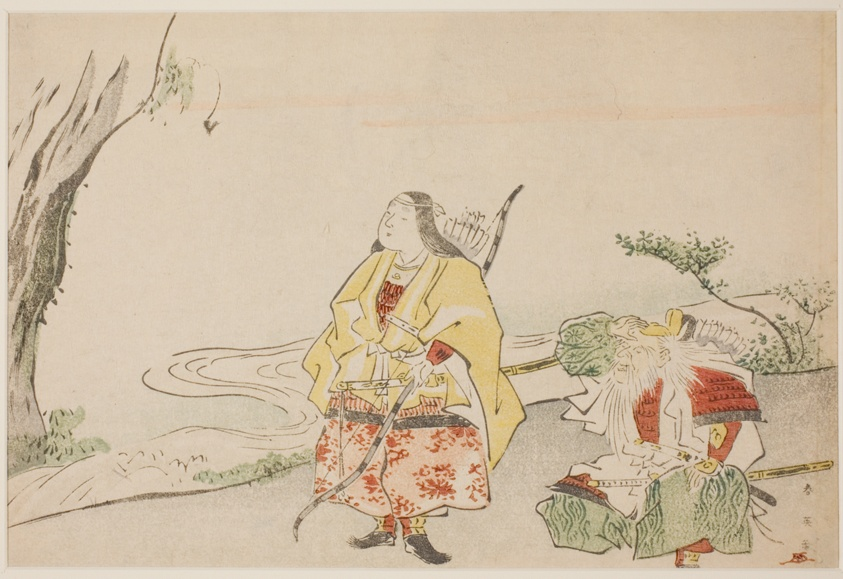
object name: Print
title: Empress Jingu (left), and Her Minister Takenouchi no Sukune (right)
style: Japanese (culture or style)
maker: Katsukawa Shun'ei (Japanese, 1762-1819)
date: late 1780s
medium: Color woodblock print; koban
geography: Japan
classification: woodblock print; print; asian art